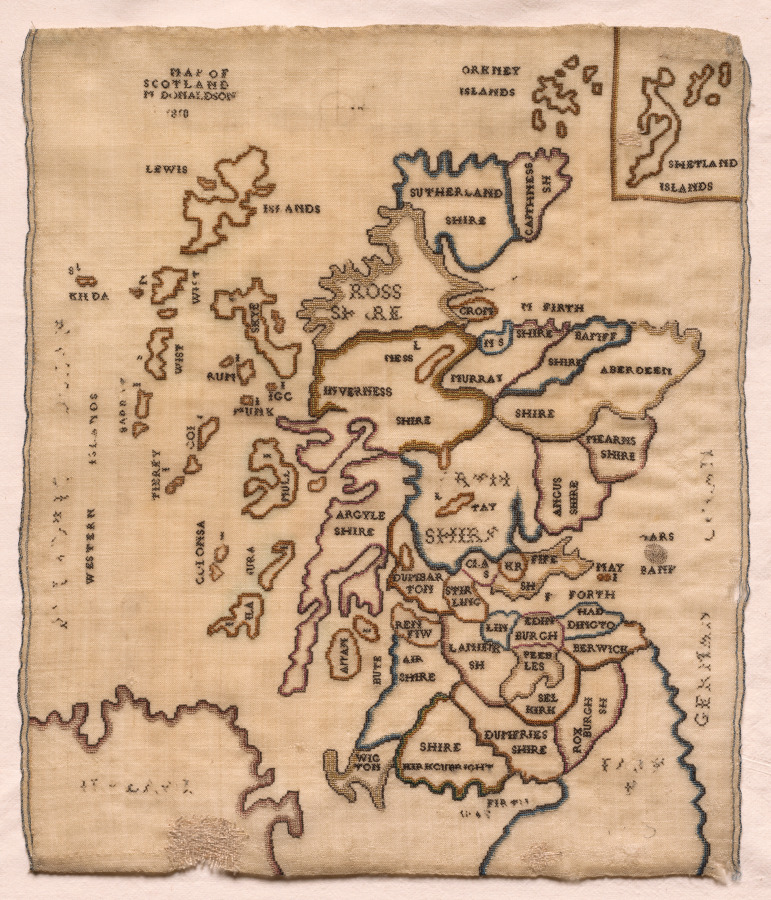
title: Sampler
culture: Scotland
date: 1810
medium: embroidery; silk on woolen canvas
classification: Sampler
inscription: map of Scotland with names of counties; top left corner: "MAP OF/SCOTLAND/ M. DONALDSON/1810."